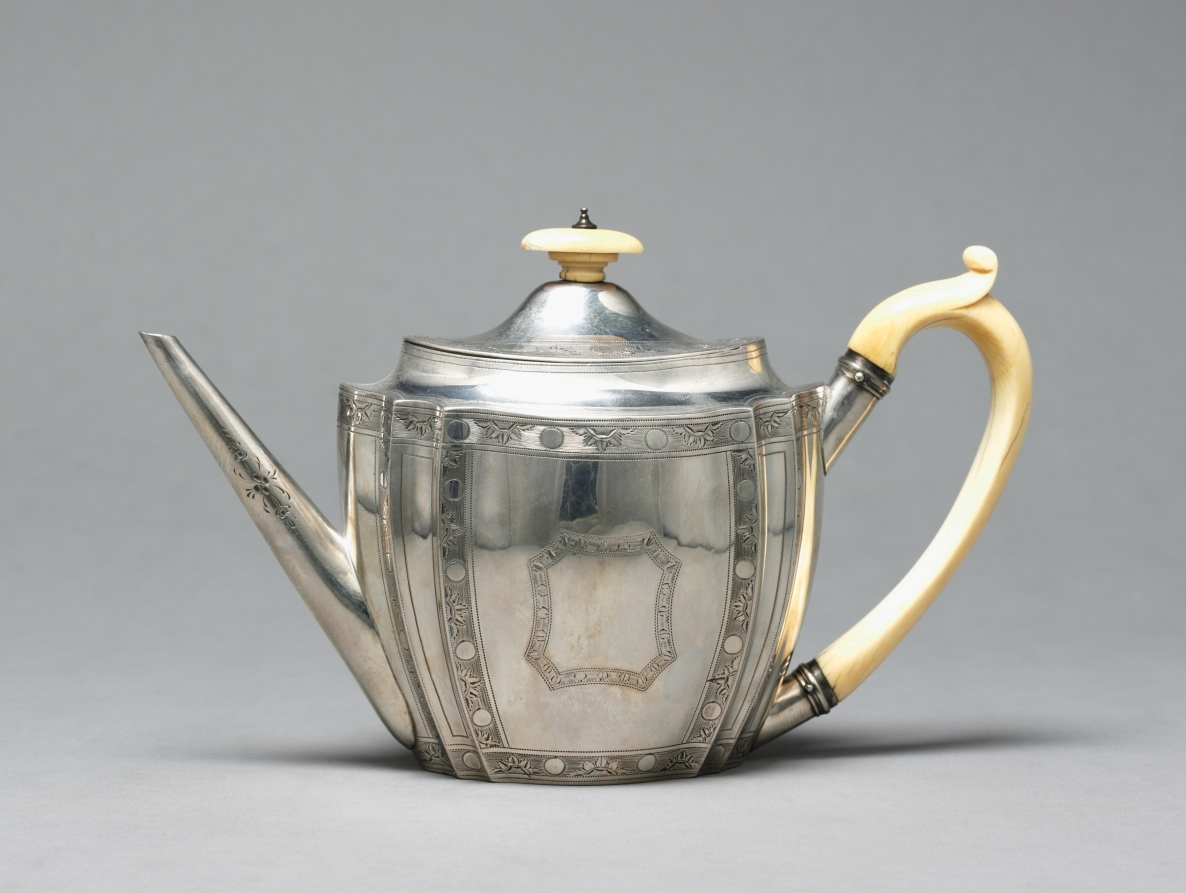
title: Teapot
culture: England, London, 18th century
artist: firm of George Smith (British)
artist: firm of Thomas Hayter (British)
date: 1795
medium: silver and ivory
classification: Silver